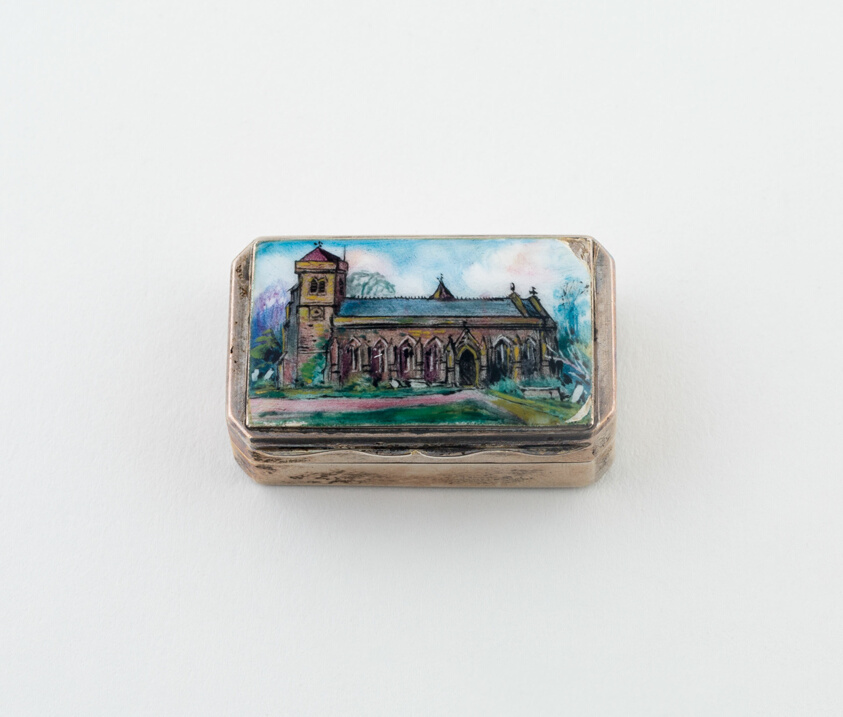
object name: Metalwork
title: Vinaigrette with View of a Church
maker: Possibly England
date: c. 1890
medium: Silver, silver gilt, and enamel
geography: England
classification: vinaigrette (container for health care); container for personal use; box; european decorative arts; metalwork; silver; decorative object/ornament